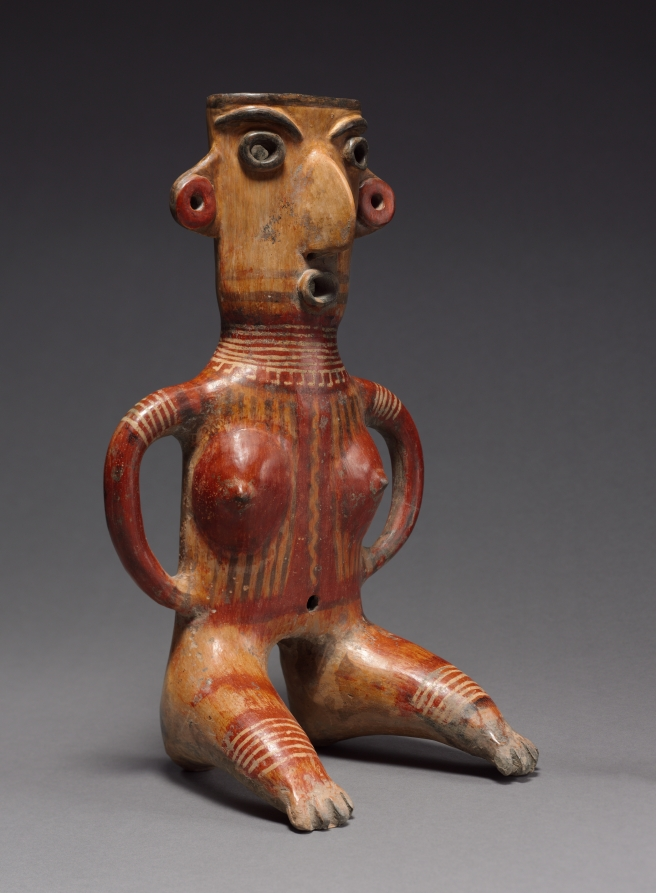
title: Seated Female Figure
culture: Mexico, Jalisco, Zacatecas style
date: 100 BCE–300 CE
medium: pottery with burnished, colored slips, resist patterning, and possibly post-fire painting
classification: Sculpture